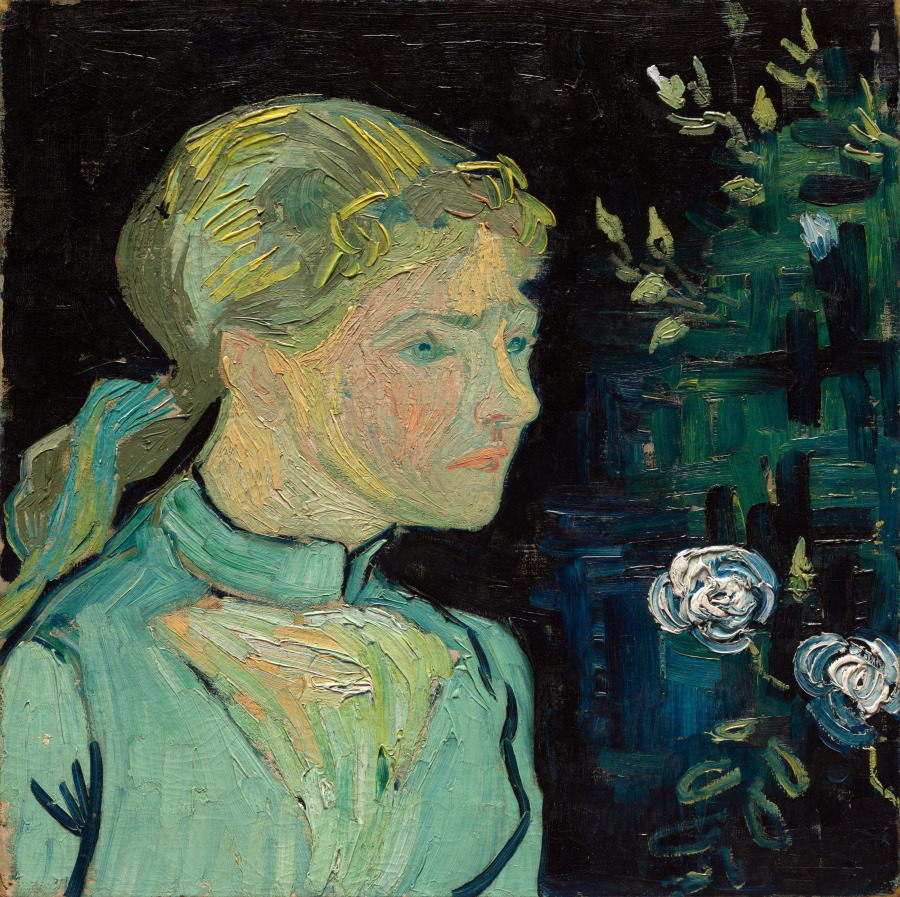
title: Adeline Ravoux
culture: Netherlands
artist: Vincent van Gogh (Dutch, 1853–1890)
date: 1890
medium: oil on fabric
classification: Painting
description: In May 1890, Vincent van Gogh arrived in Auvers, a small town north of Paris, where he rented a room at the inn of Arthur Ravoux. This portrait, completed during the last months of the artist’s life, depicts Ravoux’s 13-year-old daughter, Adeline. Van Gogh wrote that rather than photographic resemblance, he wanted his portraits to convey the “impassioned aspects” of contemporary life through the “modern taste for color.”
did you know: Adeline Ravoux, at age 13, was not pleased with her portrait and did not think the image resembled her. Today, a photograph exists of Adeline in her late seventies and the resemblance is truly remarkable.